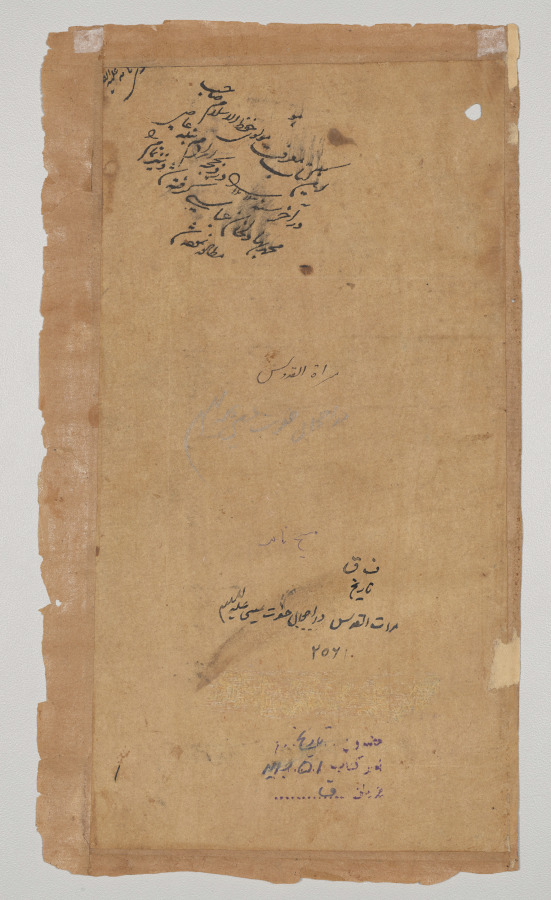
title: Illuminated opening page (folio 1 verso) and 131 folios with Persian text, from a Mirror of Holiness (Mir’at al-quds) of Father Jerome Xavier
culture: Mughal India, Allahabad, made for Prince Salim (1569–1627)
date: 1602–4; margins added with rebinding, about 1900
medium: Gum tempera, ink, and gold on paper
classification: Manuscript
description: The opening page of this Christian manuscript is ornamented in the manner of books made for elite Islamic patrons. Using costly pigments made from the semiprecious blue stone called lapis lazuli and gold paint, the artists created contrasting ground colors to set off delicate floral arabesques that evoke the waters and light of paradise. The text was written in Persian, the official court language of the Mughal rulers in India, and read from right to left. Father Jerome had studied Persian in India for seven to eight years before Akbar asked him to produce a history of the life of Jesus in Persian.